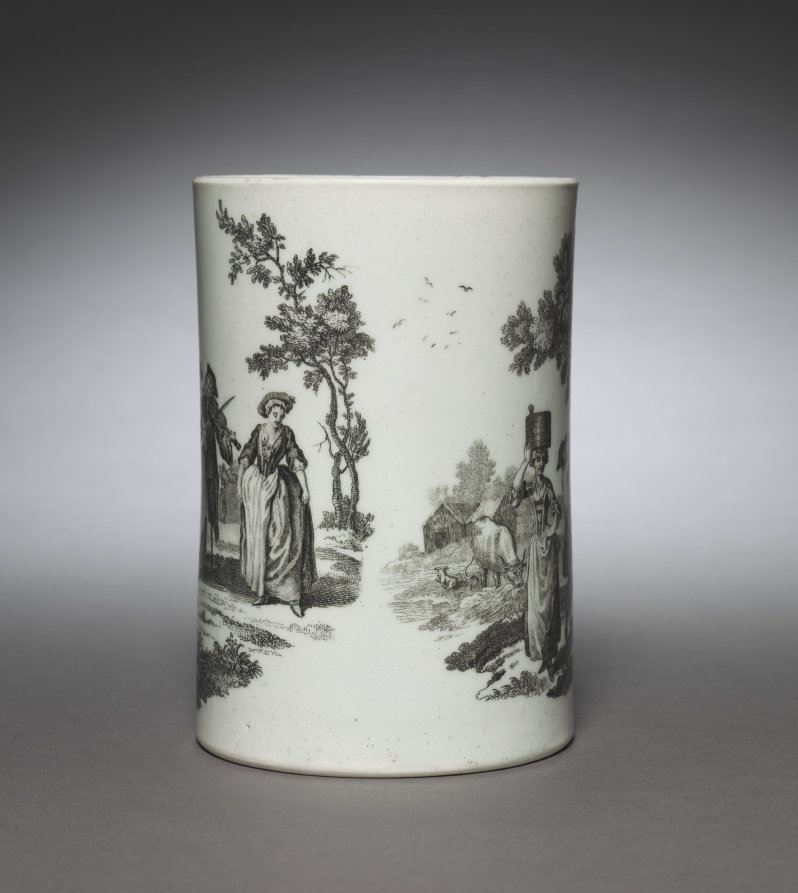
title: Cann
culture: England, 18th century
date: c. 1770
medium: ceramic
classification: Ceramic